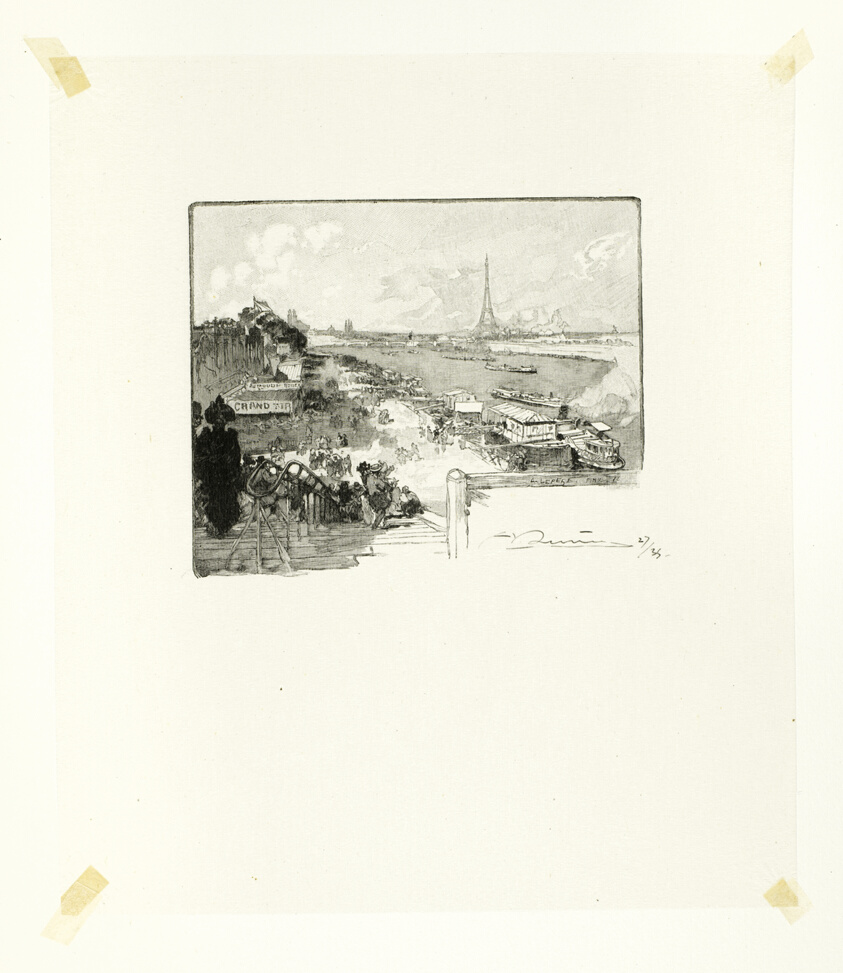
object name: Print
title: The Dawn, plate fourteen from Le Long de la Seine et des Boulevards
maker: Louis Auguste Lepère (French, 1849-1918); published by A. Desmoulins (French, active c. 1908-1910)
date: 1890, published 1910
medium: Wood engraving in black on cream Japanese tissue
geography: France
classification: wood engraving; paper; print; prints and drawing